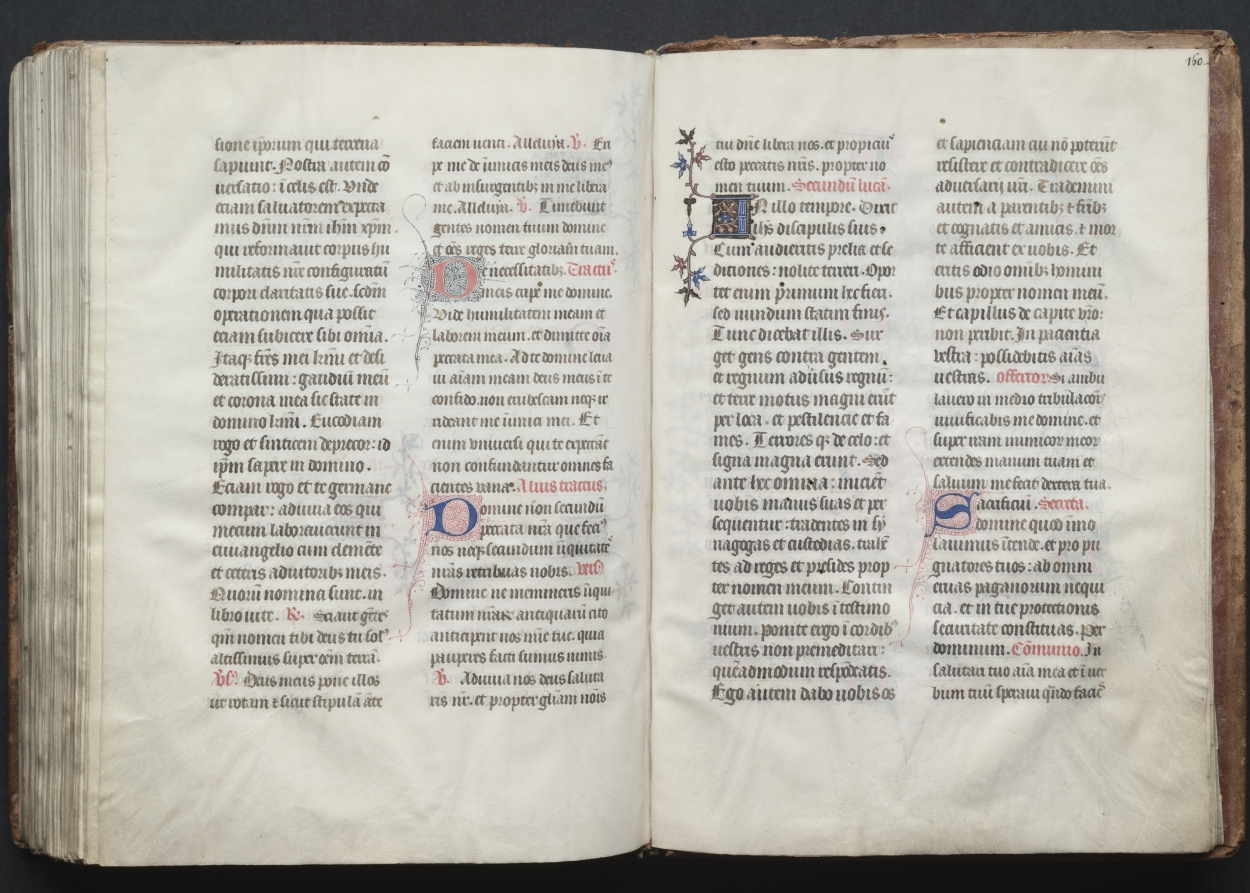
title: The Gotha Missal: Fol. 159v, Text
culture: France, Paris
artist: Master of the Boqueteaux (French)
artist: and Workshop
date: c. 1375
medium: ink, tempera, and gold on vellum; blind-tooled leather binding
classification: Bound Volume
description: The style and quality of this manuscript's decoration is typical of deluxe Parisian books made for aristocratic or royal patrons. Most of the book's decoration appears to be the work of the Master of the Boqueteaux, an artist active at the court of King Charles V (died 1380). His style was apparently shared by a number of book illuminators working in and around Paris. It is very possible that the Gotha Missal belonged to Charles V, but is not provable because the manuscript has no royal portraits and lacks a colophon. Given the book's magnificent decoration, however, it would seem that it was produced for a Valois prince, if not for the king himself. The manuscript receives its name from the German dukes of Gotha, its later owners.